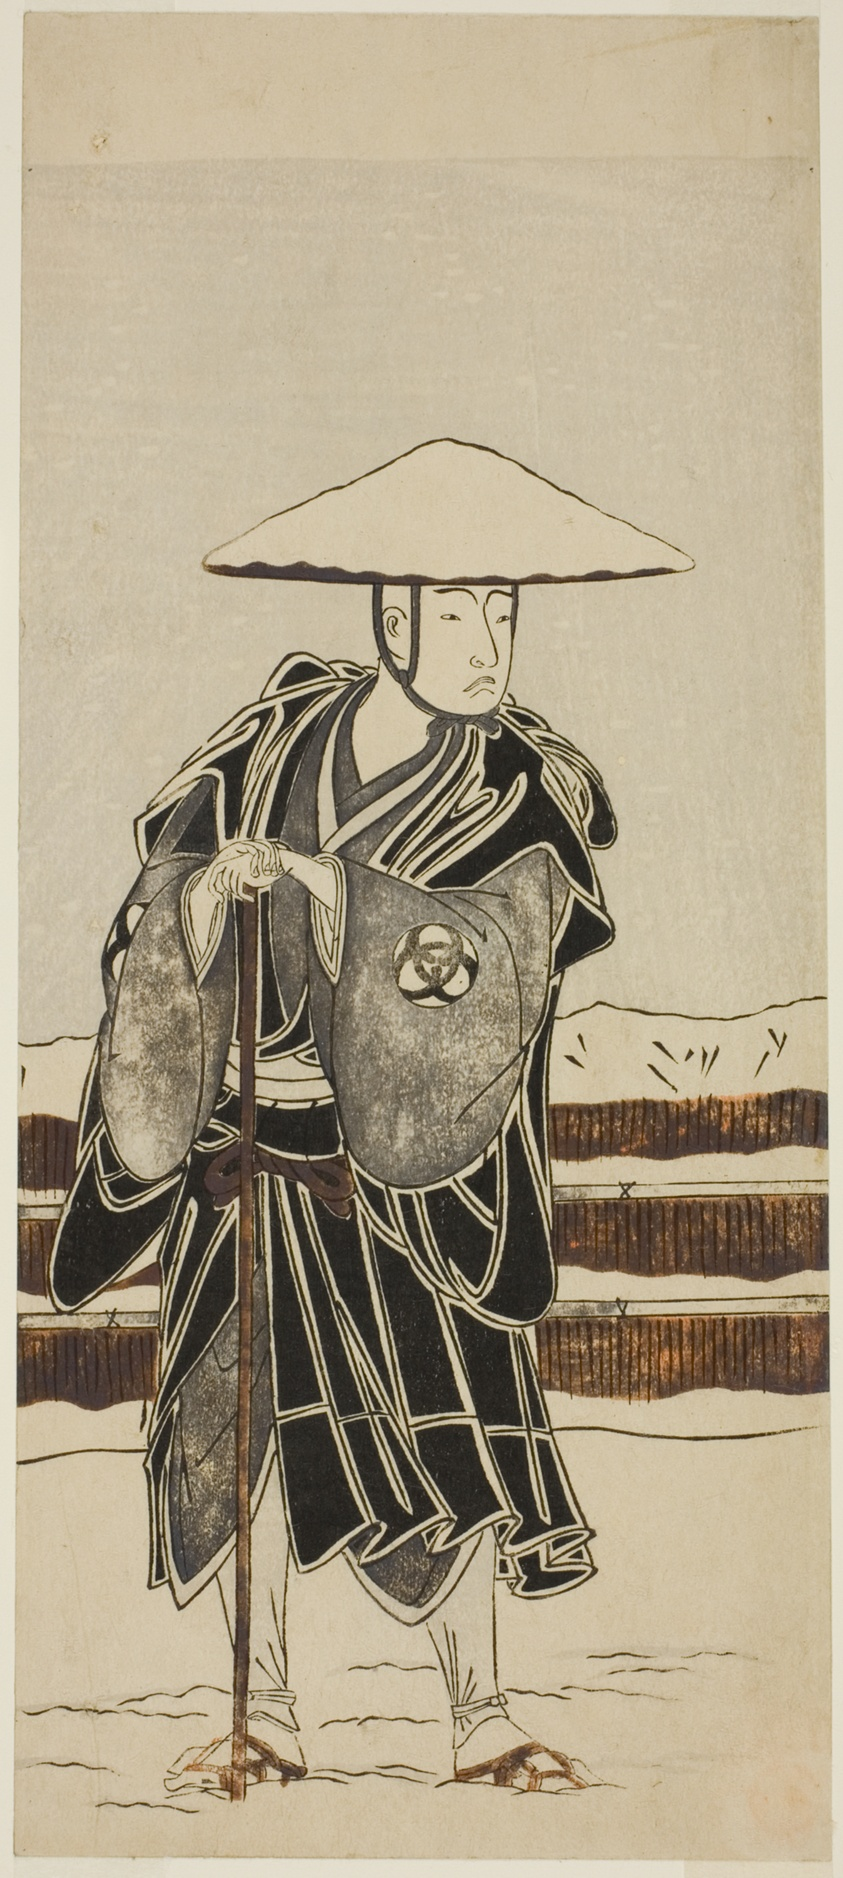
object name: Print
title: The Actor Bando Mitsugoro I as Abbot Saimyo-ji Tokiyori, Disguised as a Monk, in the Joruri "Onna Hachi no Ki" (A Female Version of "The Potted Trees") from Part Two of the Play Onna Aruji Hatsuyuki no Sekai (A Woman as Master: The World of the First Snow), Performed at the Morita Theater from the First Day of the Eleventh Month, 1773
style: Japanese (culture or style)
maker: Katsukawa Shunsho 勝川 春章; Japanese, 1726-1792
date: c. 1773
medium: Color woodblock print; hosoban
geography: Japan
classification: woodblock print; print; asian art